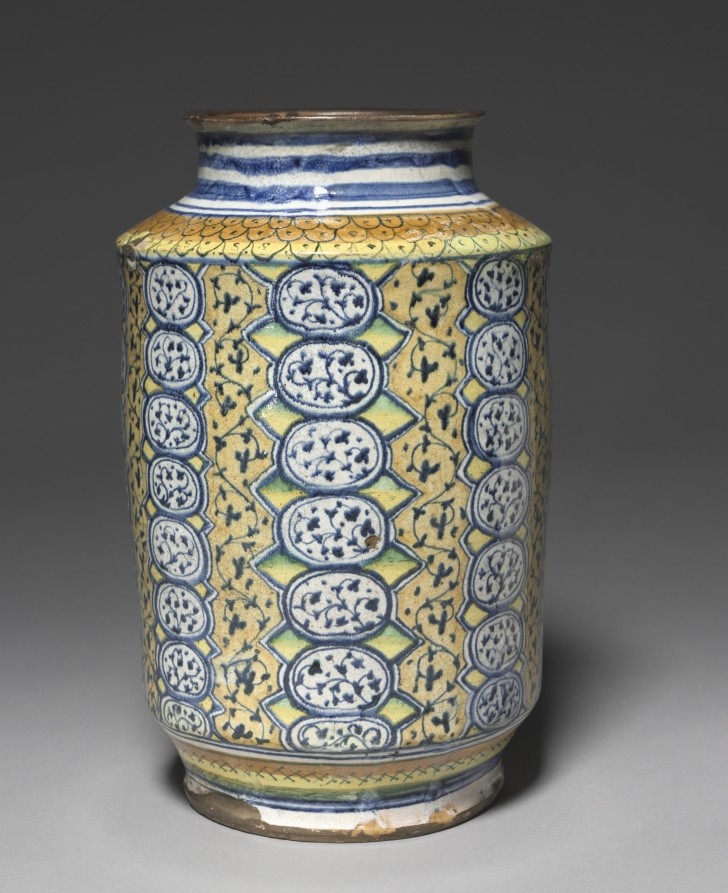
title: Cylindrical Storage Jar: Venus on the Sea Shore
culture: Italy, Faenza, 16th century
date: c. 1507–10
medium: tin-glazed earthenware (maiolica)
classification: Ceramic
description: The scene depicted on this vessel, the goddess Venus emerging from the sea and drying her hair, is based on an engraving by Marcantonio Raimondi dated September 11, 1506.